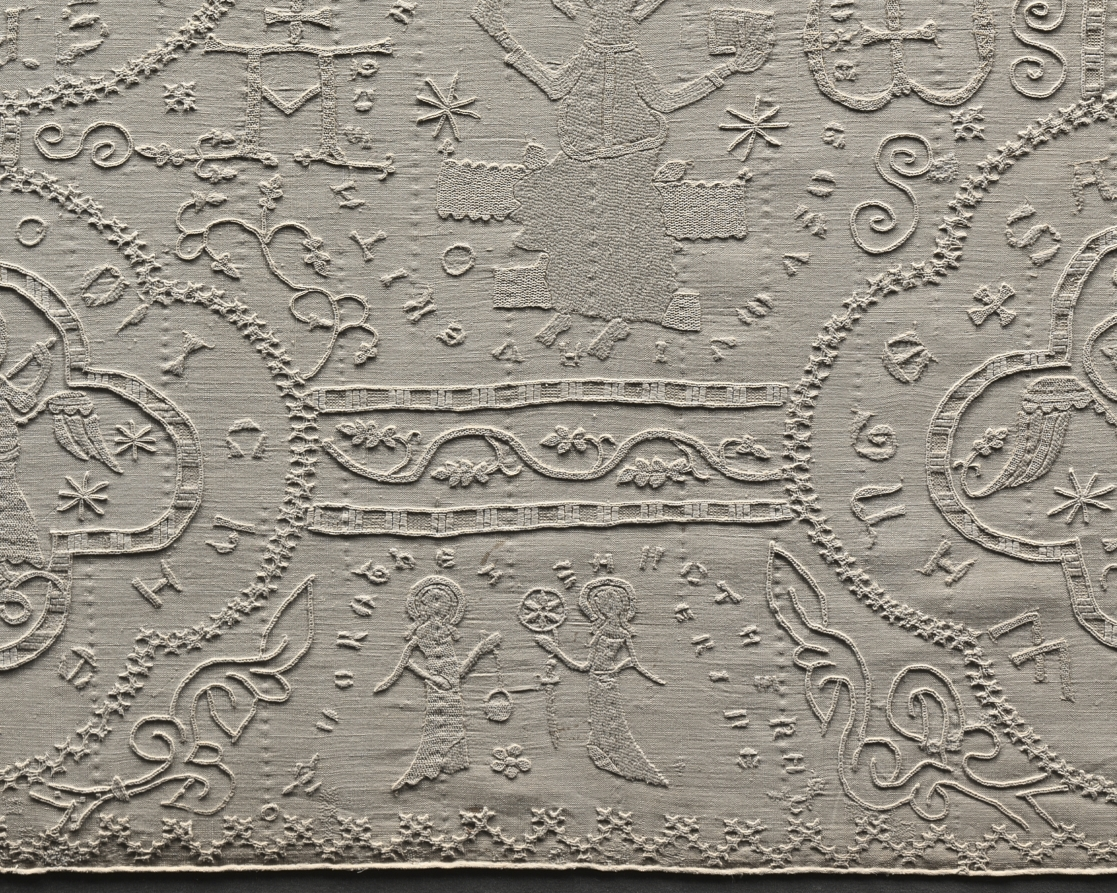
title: Altar Cloth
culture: Germany, Altenberg on the Lahn, Premonstratensian Convent, 14th century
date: c. 1350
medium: embroidery: linen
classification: Embroidery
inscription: various motifs enclosed in quatrefoils with identifying inscriptions in Gothic letters.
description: This large, embroidered altar cloth is one of the rarest, most important medieval church furnishings in existence. It was stitched by nuns in the Premonstratensian Convent in Altenberg on the Lahn River, north of Frankfurt, Germany, and was used to cover the church’s high altar in the weeks leading up to Easter. The cloth is an example of linen embroidery, a specialty of German nuns in the later Middle Ages. The Altenberg monastery church once had valuable furnishings; the high altar retable (a decorated frame with sculptures and paintings on the top of an altar) has survived, the main parts of which are now in the Städel Museum in Frankfurt, Germany.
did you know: When lit from behind, the previously hidden details emerge and the complex design becomes evident.